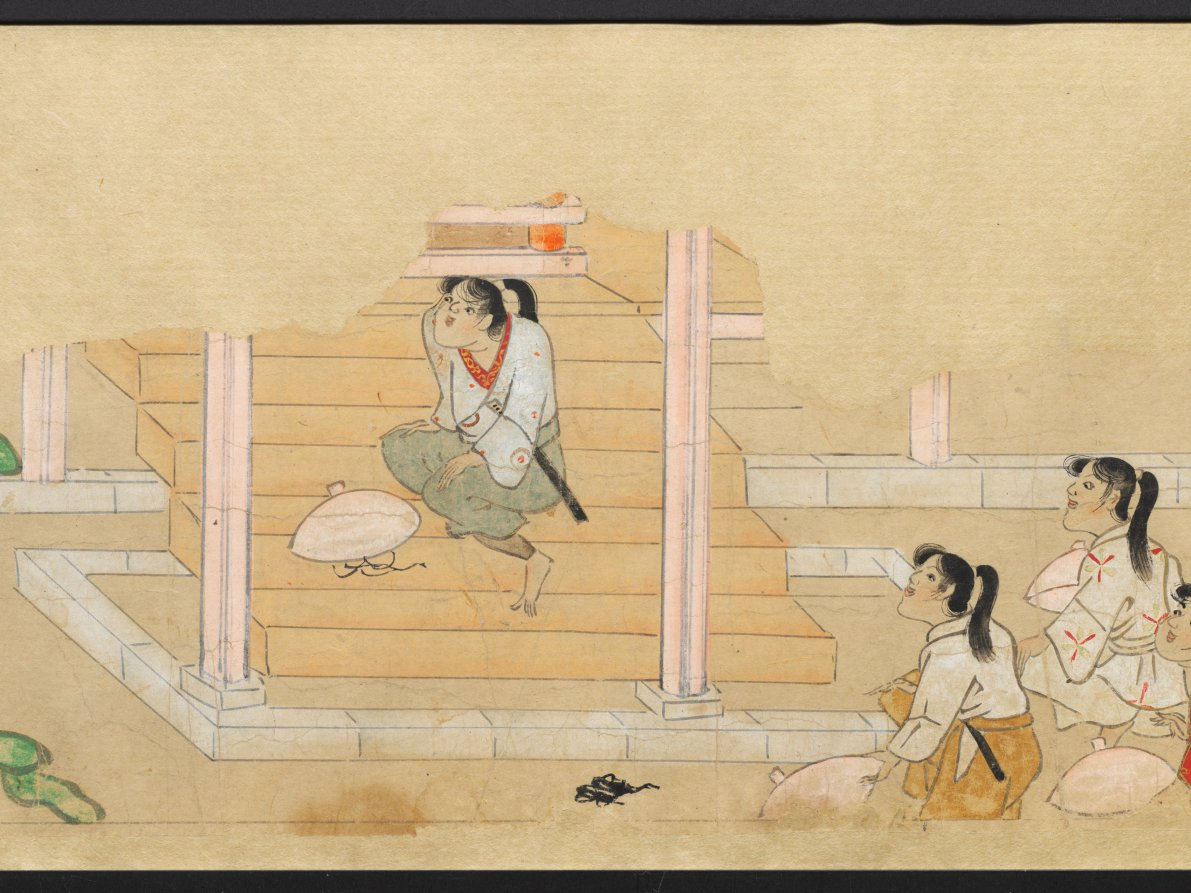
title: The Saltmaker's Story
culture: Japan, Edo period (1615–1868)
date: early 1600s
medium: One of a pair of handscrolls; ink, color, and gold on paper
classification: Painting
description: Once read and copied by girls at New Year’s celebrations and included in dowries, The Saltmaker’s Story is a rags-to-riches tale in which daughters are gifts from the gods. Despite his simple outlook, the main character progresses from humble roots as an associate at Kashima Shrine to the elite status of grandfather of the emperor through the intervention of the Kashima deity. The Saltmaker’s Story is traditionally presented in a set of three scrolls, but the text of this set has been removed by a previous owner, who remounted the illustrations as a pair. The paintings of this one take us from right to left through the second half of the tale.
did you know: This handscroll originally had texts before its paintings, but the texts were removed.